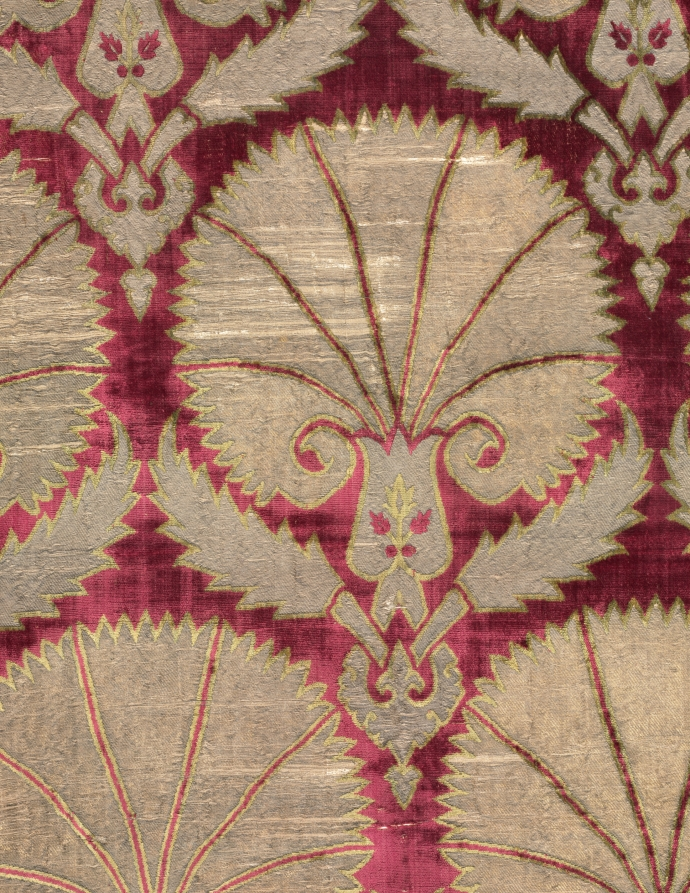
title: Brocaded velvet cushion cover with carnations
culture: Turkey, Bursa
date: late 1500s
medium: velvet, brocaded: silk, gilt-and-silver-metal thread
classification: Velvet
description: The lappet designs on the top and bottom identify this textile as an Ottoman cushion cover for a royal divan, or sofa, used in the royal court. Its bold, graphic pattern is made up of carnations in three staggered rows. Carnations are distinguished from other floral motifs by their sawtooth petals and serrated leaves.